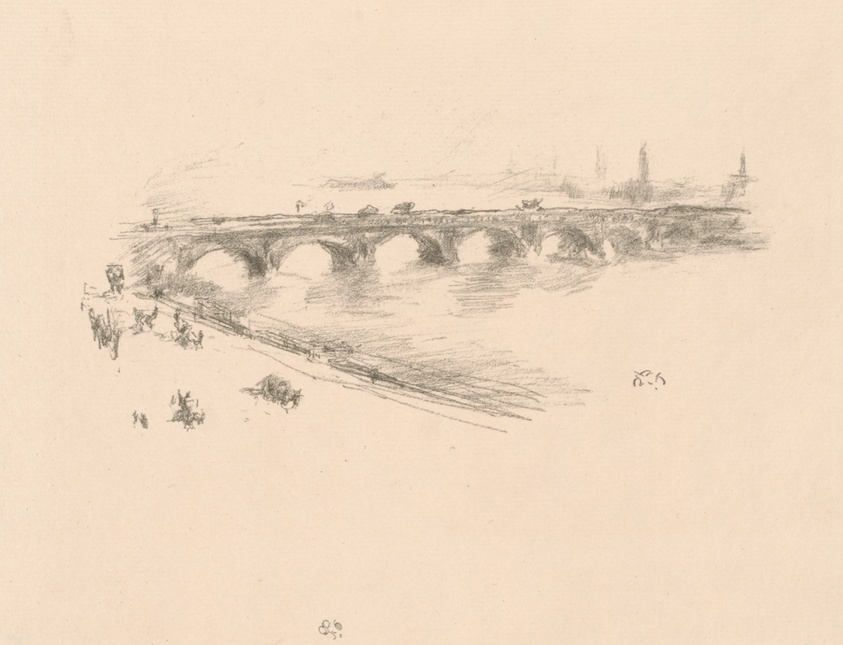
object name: Print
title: Evening, Little Waterloo Bridge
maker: James McNeill Whistler (American, 1834-1903)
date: 1896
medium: Transfer lithograph in black with stumping, on cream laid paper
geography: United States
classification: transfer lithograph; lithograph; print; prints and drawing; paper